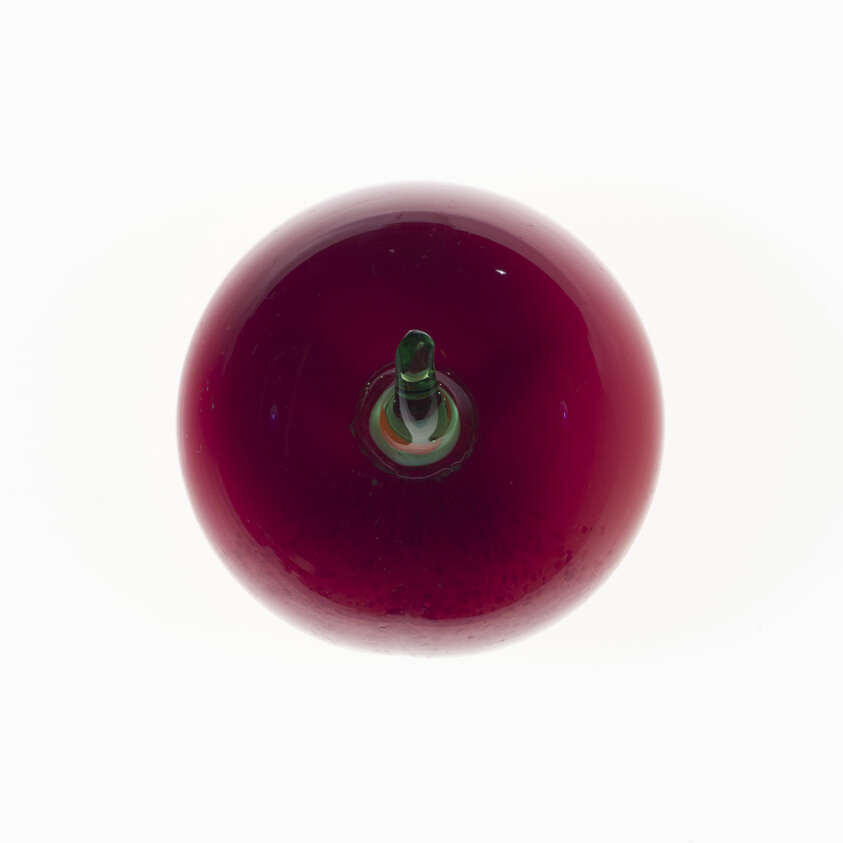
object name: Glass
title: Paperweight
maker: New England Glass Company (Cambridge, Massachusetts, 1818-1888)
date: Late 19th century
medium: Glass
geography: United States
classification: paperweight; glass